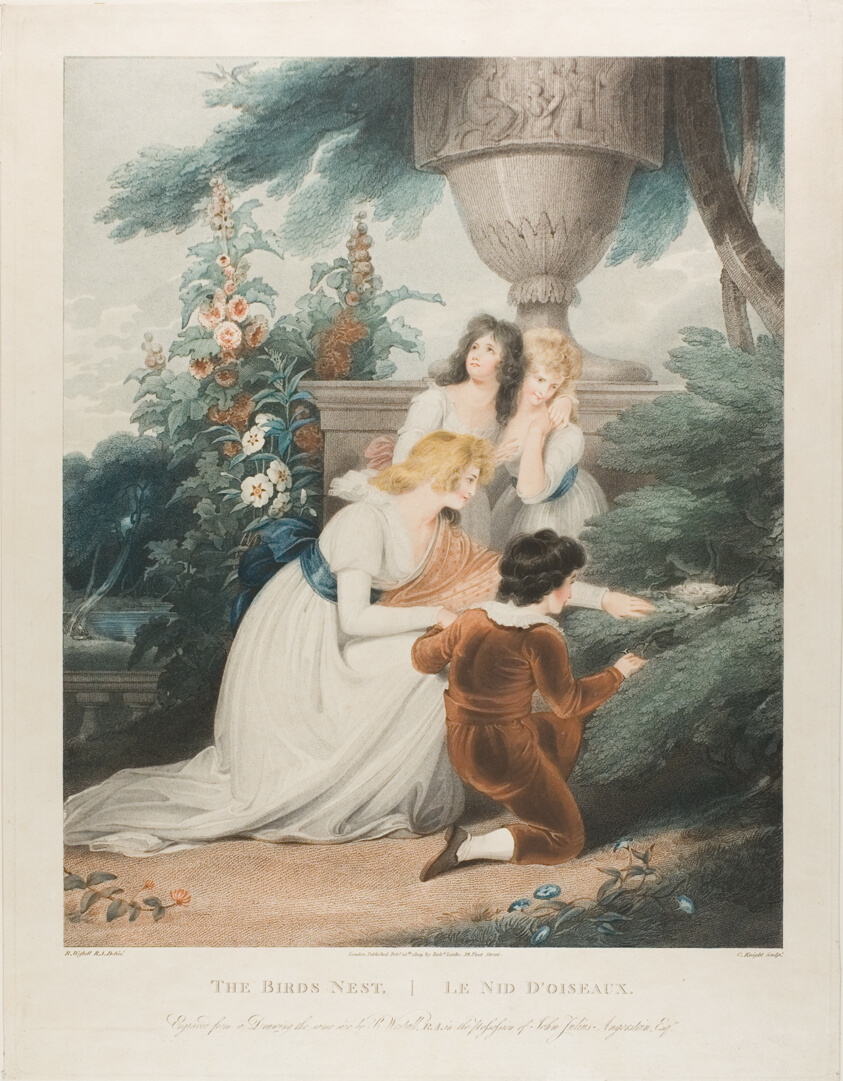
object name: Print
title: The Bird's Nest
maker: Charles Knight (English, 1743-c. 1826); after William Westall (English, 1781-1850)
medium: Colored engraving on paper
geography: England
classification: engraving; aquatint; print; prints and drawing